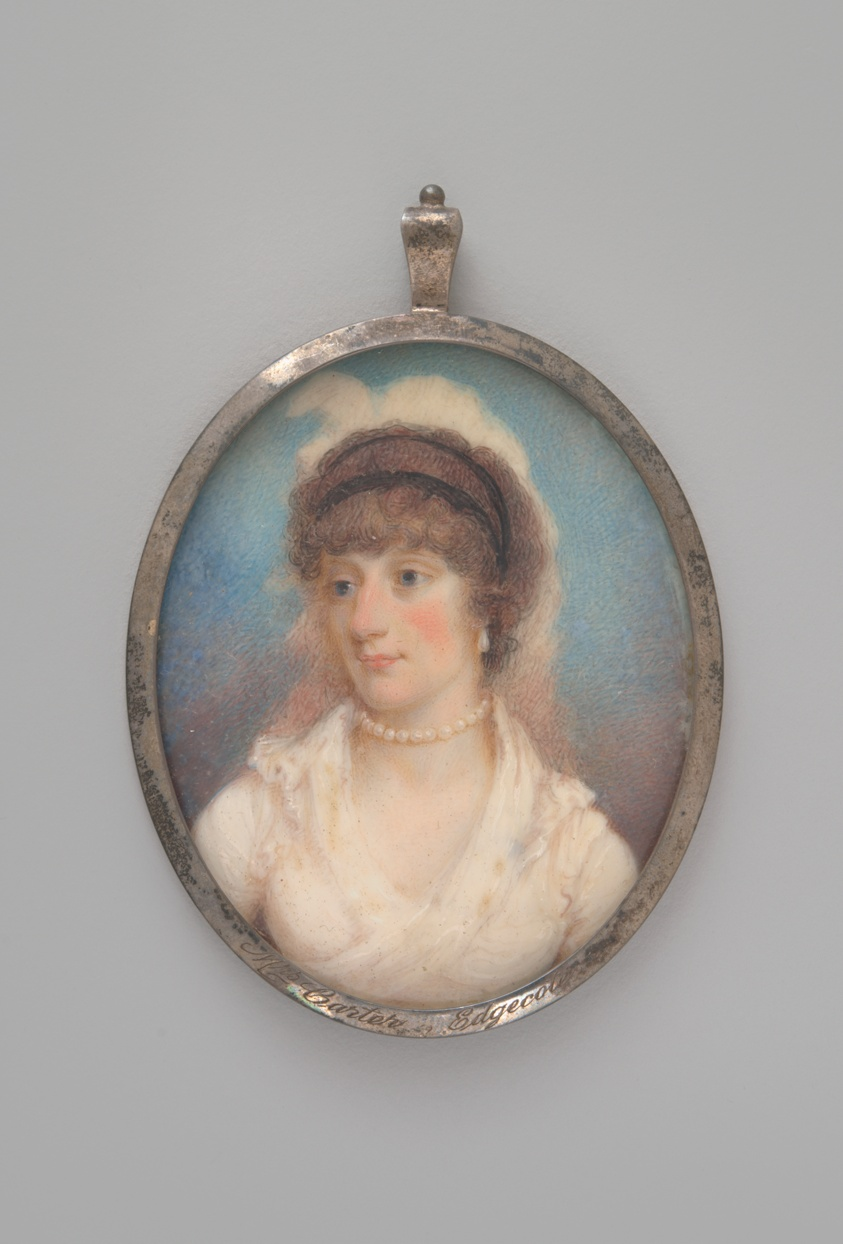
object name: Miniature Painting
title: Portrait of Mrs. Carter of Edgecote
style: 18th Century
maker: Attributed to Anne Mee (English, c. 1760–1851)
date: 1793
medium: Watercolor on ivory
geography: England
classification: miniature painting; european decorative arts; european painting; miniature; portrait; portrait; ivory; british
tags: portrait, portraits, portraits: female subject, red (color), blue (color), blue, earrings, necklace, feathers, jewelry, pearls, white (color), woman